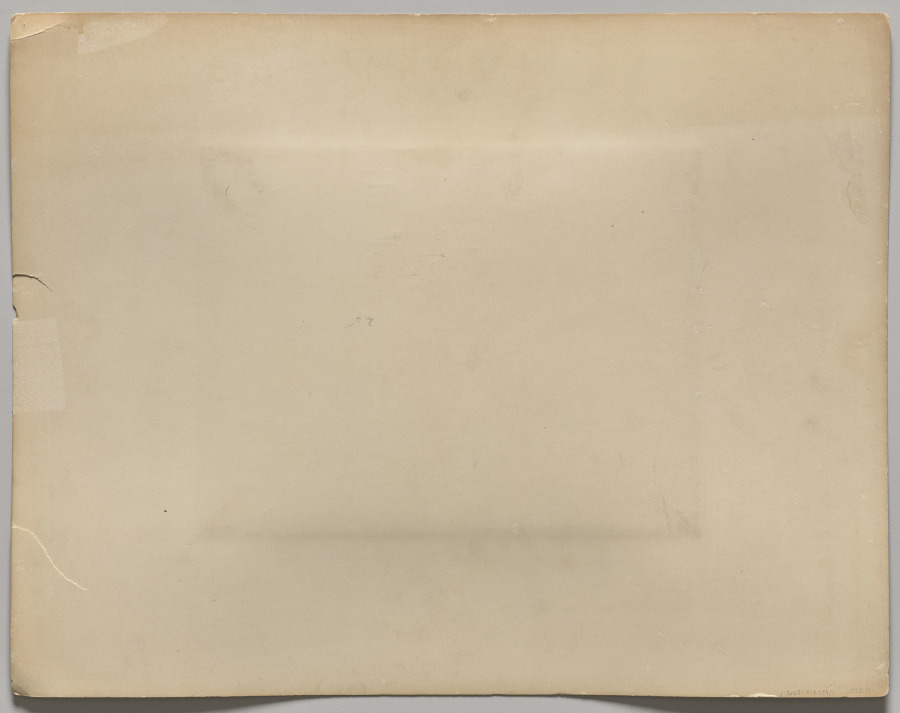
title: Les cariatides du Ramesseum 134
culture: Turkey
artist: Abdullah Frères (Turkish, 1858–1899)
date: 1860–80s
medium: albumen print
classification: Photograph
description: This photograph of the ruins of the memorial temple of Egyptian pharaoh Ramesses the Great was produced by Abdullah Frères, a studio run by three brothers. Based in Istanbul, it was the most celebrated photographic studio in the Ottoman Empire. This depiction of the sculptures of Osiris and the pharaoh echoes and complements views of these sculptures by British photographer Francis Frith (1992.236) and French photographers Henri Béchard (2006.118) and Adolphe Braun (1992.244).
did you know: While Britain maintained a significant military and commercial presence in Egypt in the nineteenth century, the country was ruled by the Ottoman Empire.